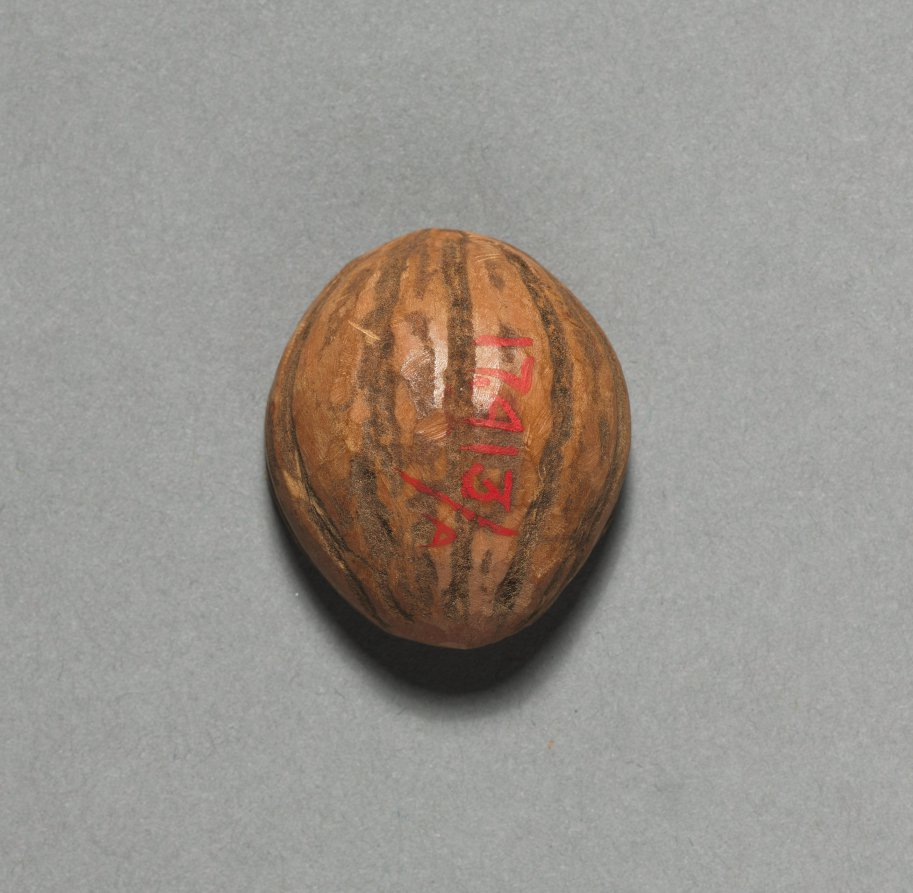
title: Gambling Dice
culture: California, Tulare, Unassigned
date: before 1917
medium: hollow shell, resin, glass beads, mica/seashell fragment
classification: Implements